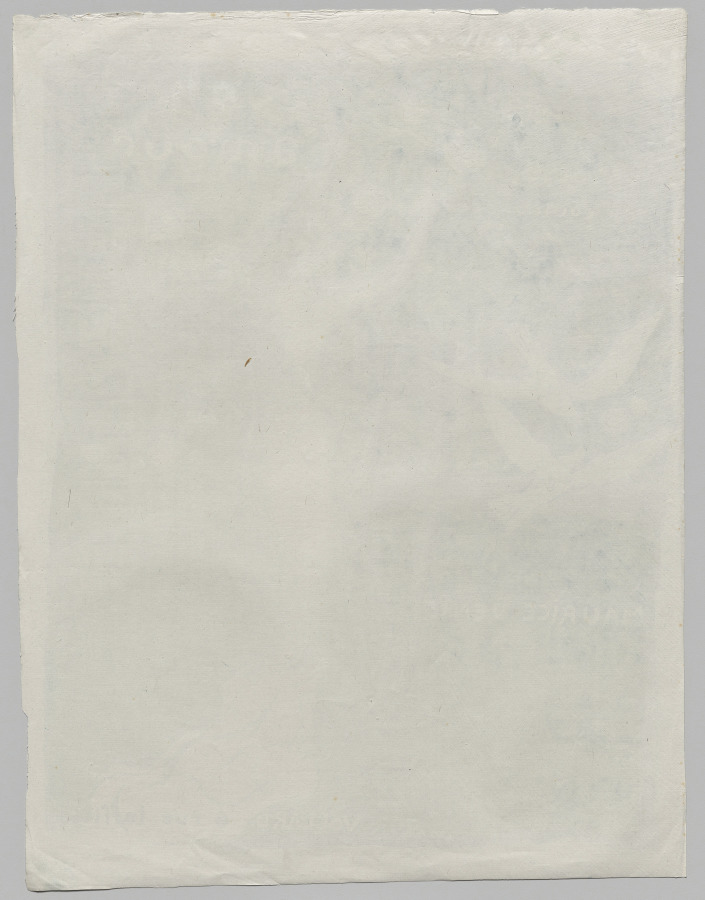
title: Title Page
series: Love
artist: Maurice Denis (French, 1870–1943)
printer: August Clot (French, 1858–1936)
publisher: Ambroise Vollard (French, 1867–1939)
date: 1899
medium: color lithograph on China paper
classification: Print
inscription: In graphite, recto, lower left: [illegible number]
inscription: In graphite, recto, lower right: Maurice Denis (signed)”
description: Maurice Denis belonged to the Nabis, a group of artists who came together in 1889 to pursue a radical new style informed by subjective experience and emotion. This print is from a series in which Denis explored his devotion to his wife, Marthe, by depicting her in a variety of settings alongside titles drawn from his own journal. The vague but evocative images were meant to encourage the viewer to draw connections to the theme and meditate on its meaning.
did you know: Maurice Denis was a devout Catholic and often drew visual connections between his wife, Marthe, the subject of this print series, and the Virgin Mary.